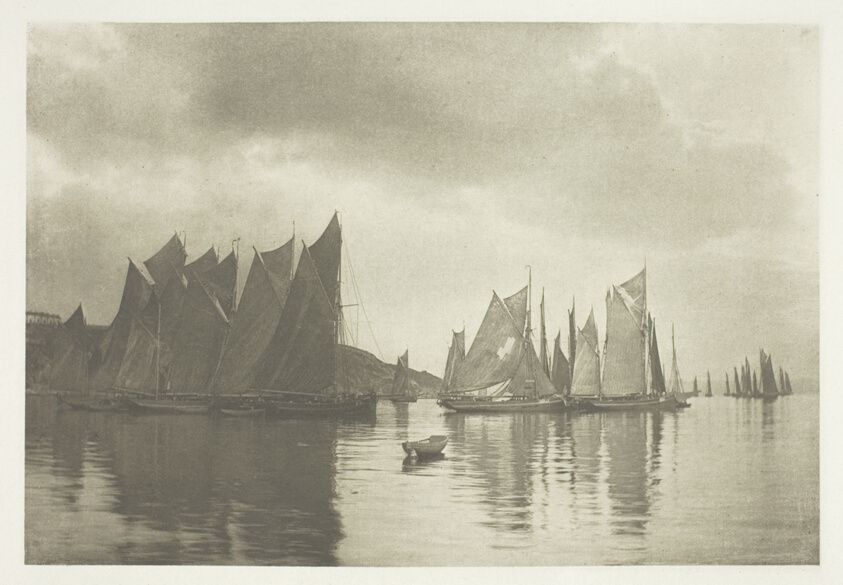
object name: Photograph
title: Brixham Trawlers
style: 19th century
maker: Mr. J. Gale (English, died 1906)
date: c. 1889, printed October 1889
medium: Photogravure, from "Sun Artists, Number 1" (1889)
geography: England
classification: photogravure; photomechanical process; photography; photograph